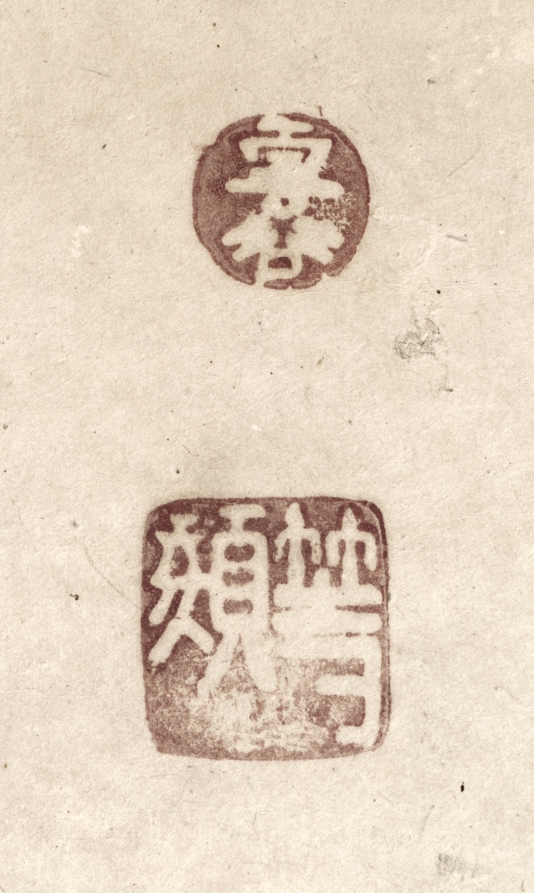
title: Su Shi (So Shoku)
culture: Japan, Momoyama period (1573–1615)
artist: Unkoku Tōgan (Japanese, 1547–1618)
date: early 1600s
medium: one of a pair of six-panel folding screens; ink, light color, and gold on paper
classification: Painting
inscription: Each screen in the pair is impressed with two seals arranged vertically, a round "Unkoku" seal above and square "Togan" seal below.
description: This pair of screens depicts episodes from the stories of famed Song-dynasty poets Su Shi of the 1000s and Zhou-dynasty official Pan Lang of the 900s. Both men were banished by their rulers for their perceived missteps. Su Shi’s comments on a series of economic reforms were seen as criticism of the emperor. Pan Lang composed an ill-advised verse about one of the king’s horses. In the left screen Pan rides backward on his donkey as he returns from exile so that he may have a last look at his now beloved Mount Hua. Su Shi, in the right screen, is shown embarking on his journey into exile. The artist of these screens, Unkoku Tōgan, was the founder of the Unkoku school of painting, which emulated the style of renowned ink painter Sesshū Tōyō (1420–1506). Tōgan was the official painter of the Mori family of what is now Yamaguchi prefecture in the south of Japan.